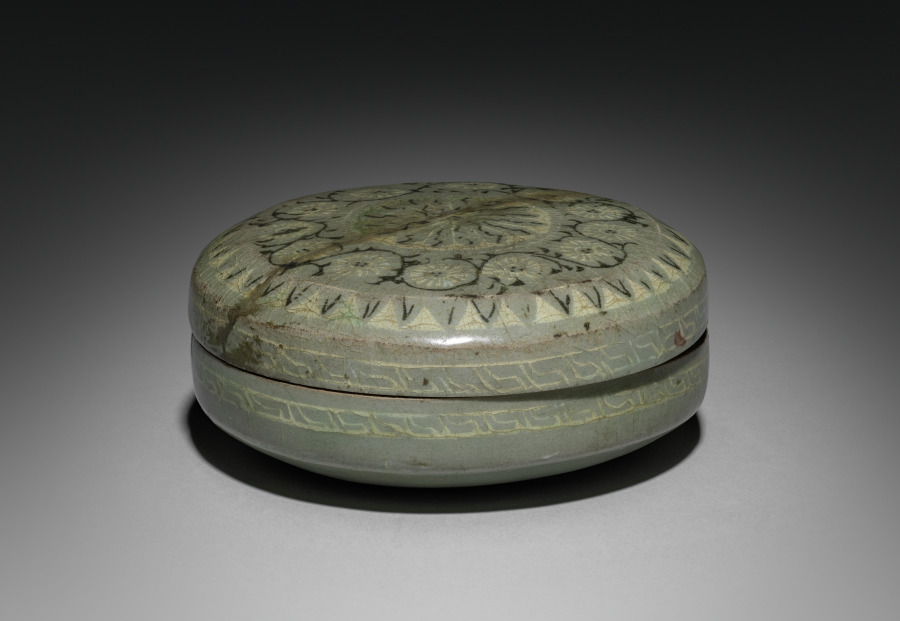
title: Box and Cover with Inlaid Chrysanthemum and Scroll Design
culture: Korea, Goryeo dynasty (918–1392)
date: 1200s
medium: pottery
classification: Ceramic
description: Celadons, spoons, seals, and bronze mirrors were the most common burial objects in tombs during the Goryeo period (918–1392). Once used to contain colored powder, rouge, and eyebrow gel for makeup, this small container was one of the standard goods that furnished tombs of the elites. Both women and men used the grain powder of rice or millet for whitening their skin, safflower extract for rouge, and plant ash or soot for eyebrow gel. Yet, natural-looking makeup seems to have been the most favorable one in Korea according to the travelogue by Xu Jing (1091–1153), the Chinese diplomat who visited Korea in 1123.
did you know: This ceramic container was used to store either incense or cosmetics.